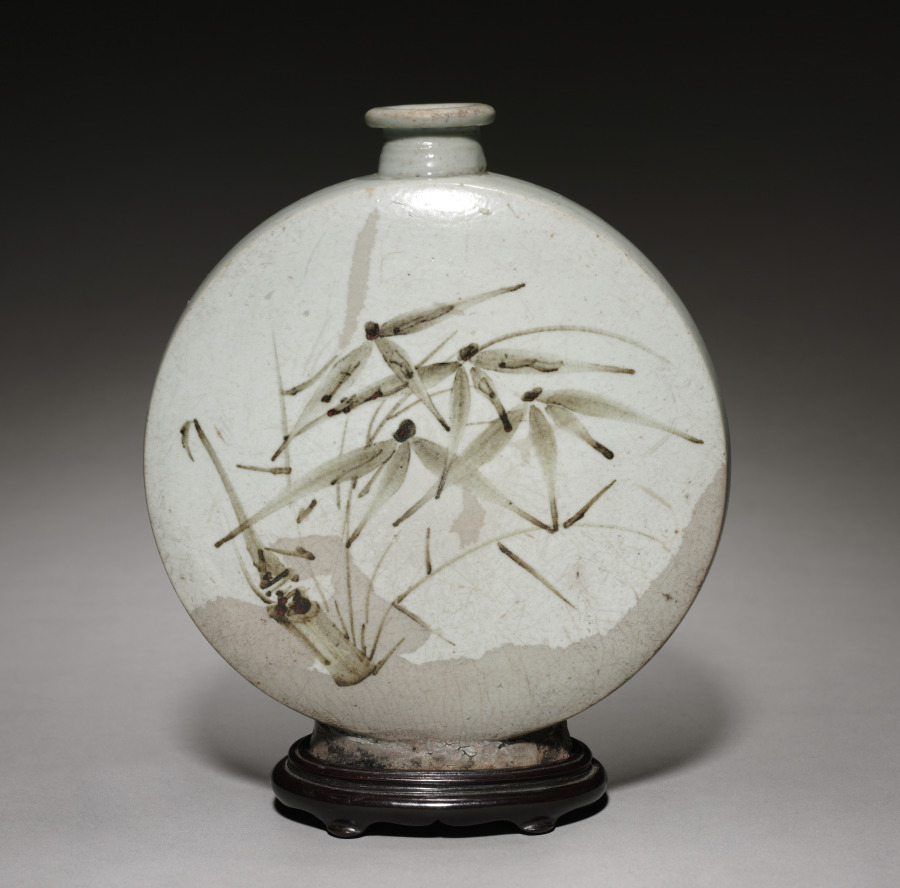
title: Wine Flask with Plum and Bamboo Design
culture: Korea, Joseon dynasty (1392–1910)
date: 1600s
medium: glazed porcelain with underglazed iron design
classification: Ceramic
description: This Korean wine flask embodies Lin Bu’s poetic line "Plums’ subtle scent pervades the moonlit dusk": its circular shape alludes to the full moon, and the gray color unintentionally spread on the flask’s lower part suggests the permeating scent of plum. The other side of the flask features a bamboo design. The plum and bamboo derive from the motif of the Four Gentlemen, which compares four plants to Confucian scholarjunzi, or "gentlemen."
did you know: The shape of this bottle can be traced all the way back to an ancient Persian pilgrim’s flask.